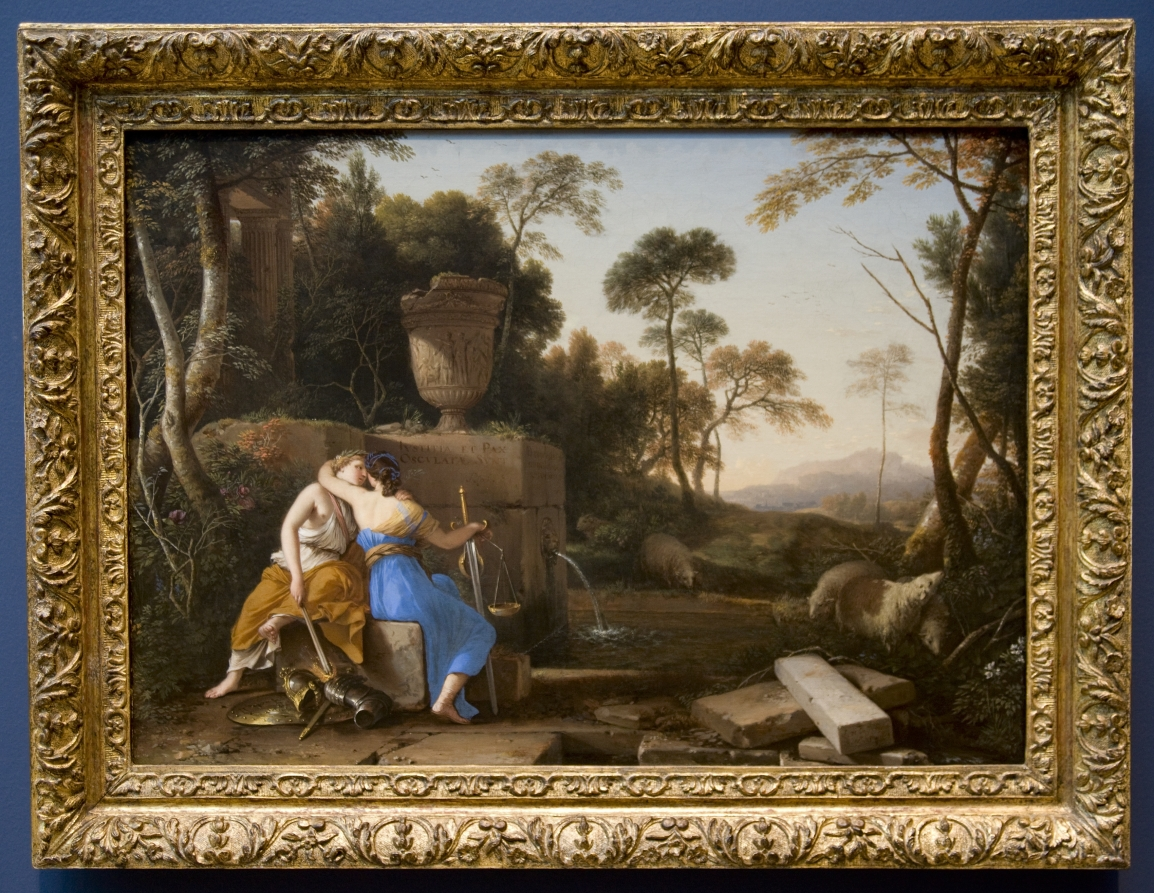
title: The Kiss of Peace and Justice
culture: France, 17th century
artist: Laurent de La Hyre (French, 1606–1656)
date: 1654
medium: oil on canvas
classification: Painting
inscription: signed lower right: L. De La Hyre. / in. & F. 1654 [inscribed on stone in center: IVSTITIA ET PAX / OSCULATAE SUNT / Psal. 84]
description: The figures of Peace (burning the weapons of war) and Justice (holding a sword and scales) embrace in a quiet landscape. The Latin inscription under the antique urn reads “Justice and Peace kissed” (referring to an Old Testament verse, Psalms 85:10). The subject may have had political significance: the painting’s date coincides with the end of the Fronde, a period of civil war in France during which the parlement (courts of appeal) and the nobility sought—unsuccessfully—to limit the power of the monarchy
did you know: While the figures of Peace and Justice may refer to Psalm 85:10, the peaceful, pastoral landscape is described in Psalm 85:12.